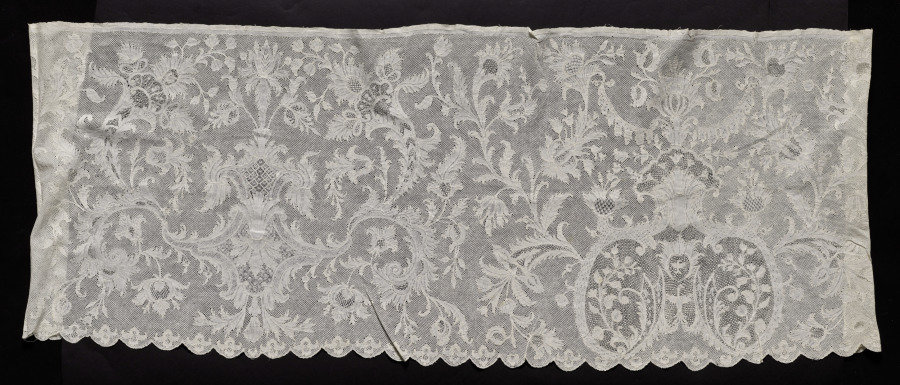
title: Lace Flounce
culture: Belgium (Flanders)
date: 1700–1720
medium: Linen: bobbin lace (mesh ground)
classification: Lace